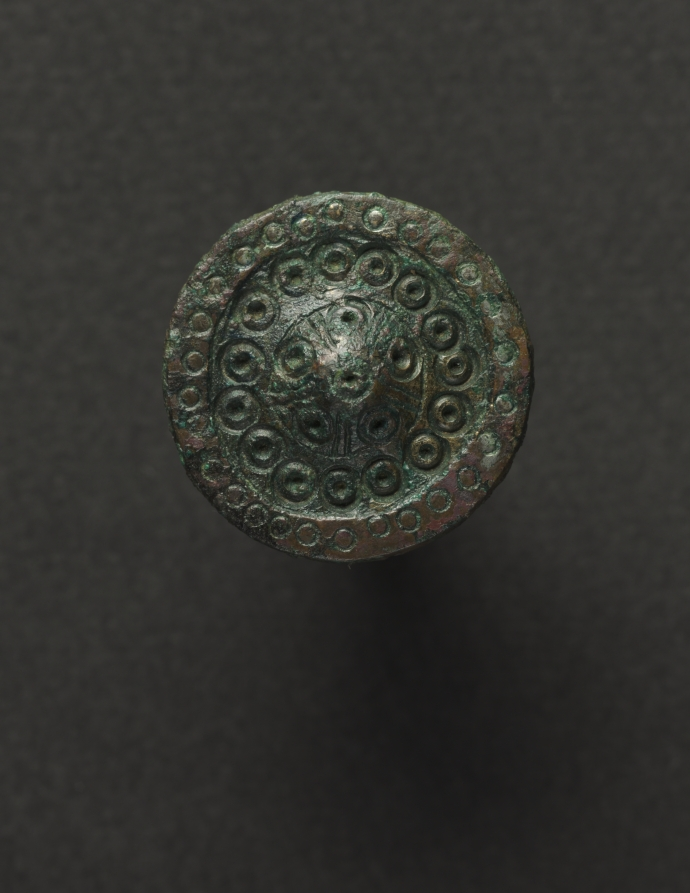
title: Brooch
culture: Frankish, Migration period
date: 600s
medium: bronze and silver overlay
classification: Jewelry